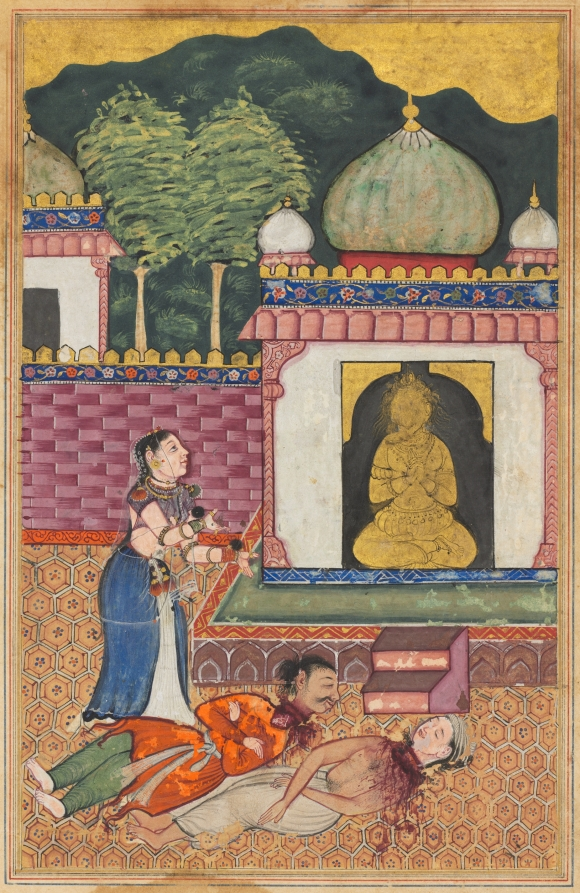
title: The princess discovers the dead bodies, with heads severed, of her husband and his Brahman friend, from a Tuti-nama (Tales of a Parrot): Thirty-fourth Night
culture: Mughal India, court of Akbar (reigned 1556–1605)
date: c. 1560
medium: gum tempera, ink, and gold on paper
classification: Painting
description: The frantic princess stands above the bodies of her husband, dressed in orange, and the Brahman. Both men have died by their own hand. They are miraculously resurrected after the princess places each head on the wrong body. Because of this mix-up, the men begin to fight over who should be considered the princess’s rightful husband.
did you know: A flag, which is a standard component of an active Hindu temple, was drawn for the tallest dome, but never painted.